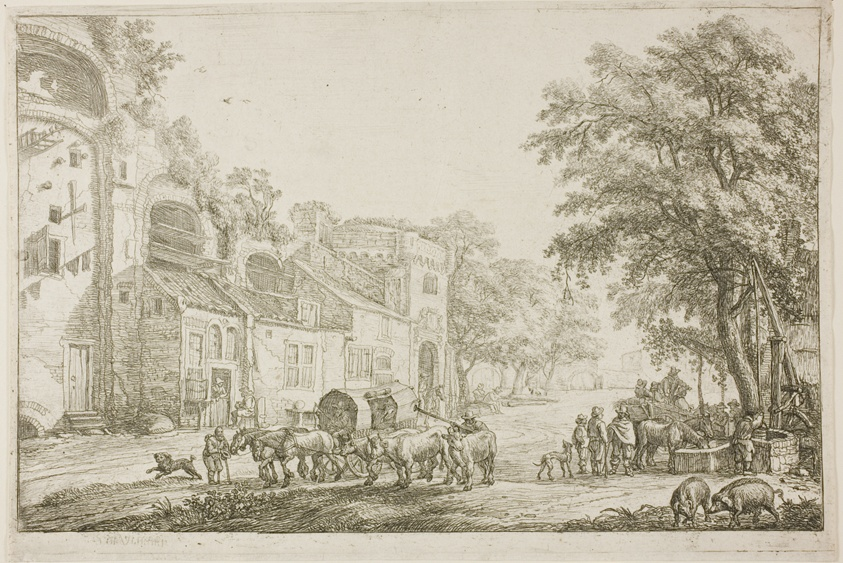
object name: Print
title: Market Town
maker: Simon de Vlieger (Dutch, c. 1600-1653)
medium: Etching on ivory paper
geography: Holland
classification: etching; print; prints and drawing